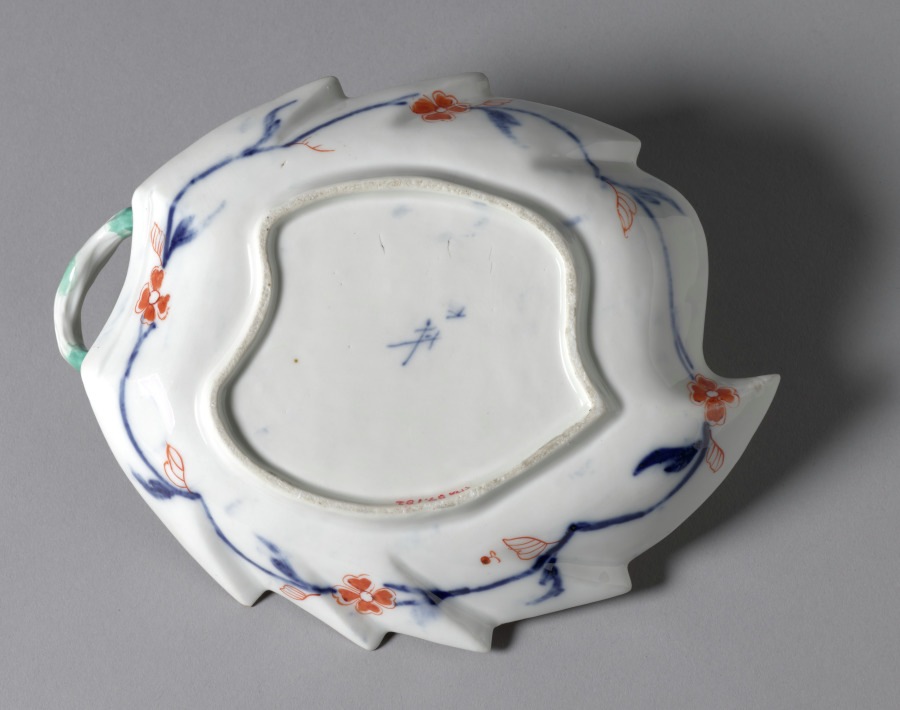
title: Leaf Dish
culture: Germany, Meissen, 18th century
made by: Meissen Porcelain Factory (German, est. c. 1710)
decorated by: possibly by Johann David Kretschmar (German)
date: c. 1735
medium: porcelain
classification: Ceramic